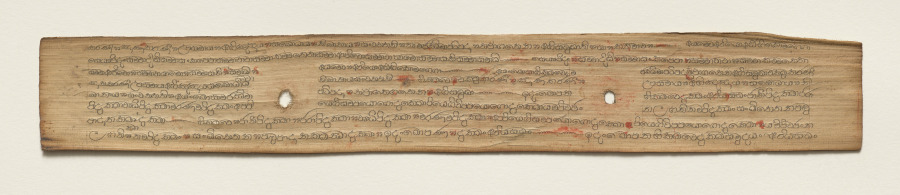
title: Leaf from a Buddhist Manuscript (verso)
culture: Sri Lanka, Singhalese, Late 17th century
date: c. 1700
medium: fiber paper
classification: Manuscript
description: Palm leaf material is still used for manuscripts in Sri Lanka. The palm leaves are prepared first by boiling them, drying them in the sun, and then rubbing them with oils. Scribes then use a metal stylus to incise the text. Then charcoal powder is wiped across the pages, filling in only the inscribed lines.